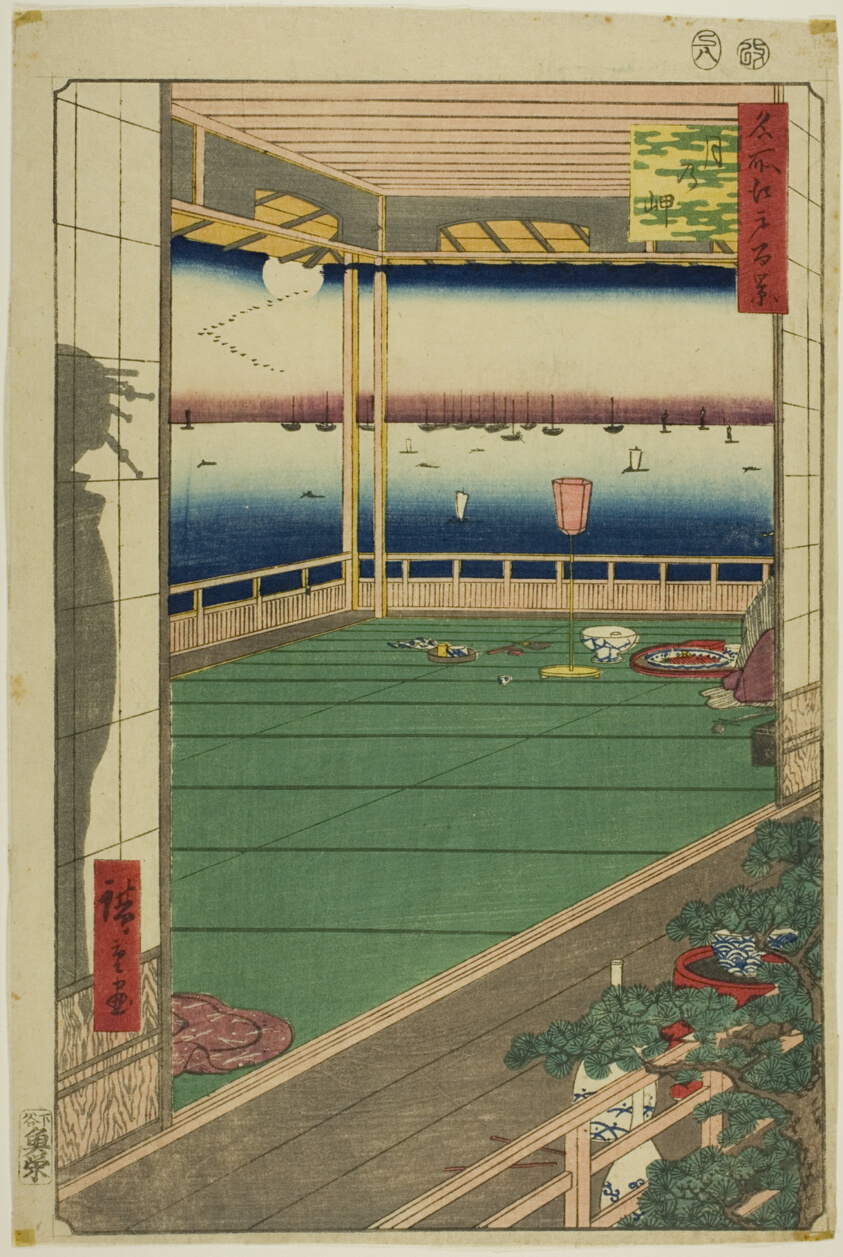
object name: Print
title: Moon-Viewing Point (Tsuki no misaki), from the series "One Hundred Famous Views of Edo (Meisho Edo hyakkei)"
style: Japanese (culture or style)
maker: Utagawa Hiroshige 歌川 広重; Japanese, 1797–1858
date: 1857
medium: Color woodblock print; oban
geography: Japan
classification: woodblock print; print